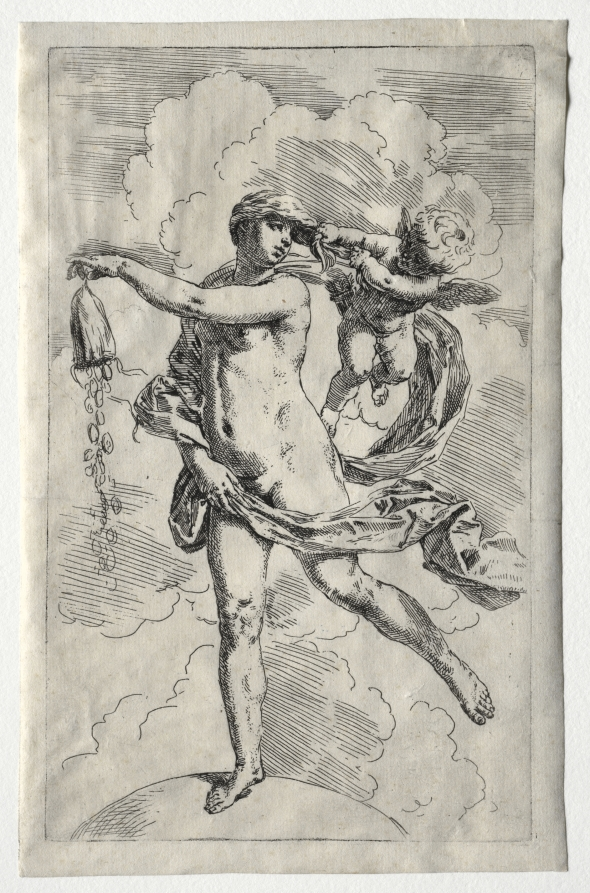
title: La Fortuna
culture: Italy, 17th century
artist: Simone Cantarini (Italian, 1612–1648)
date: 1632–58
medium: etching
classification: Print